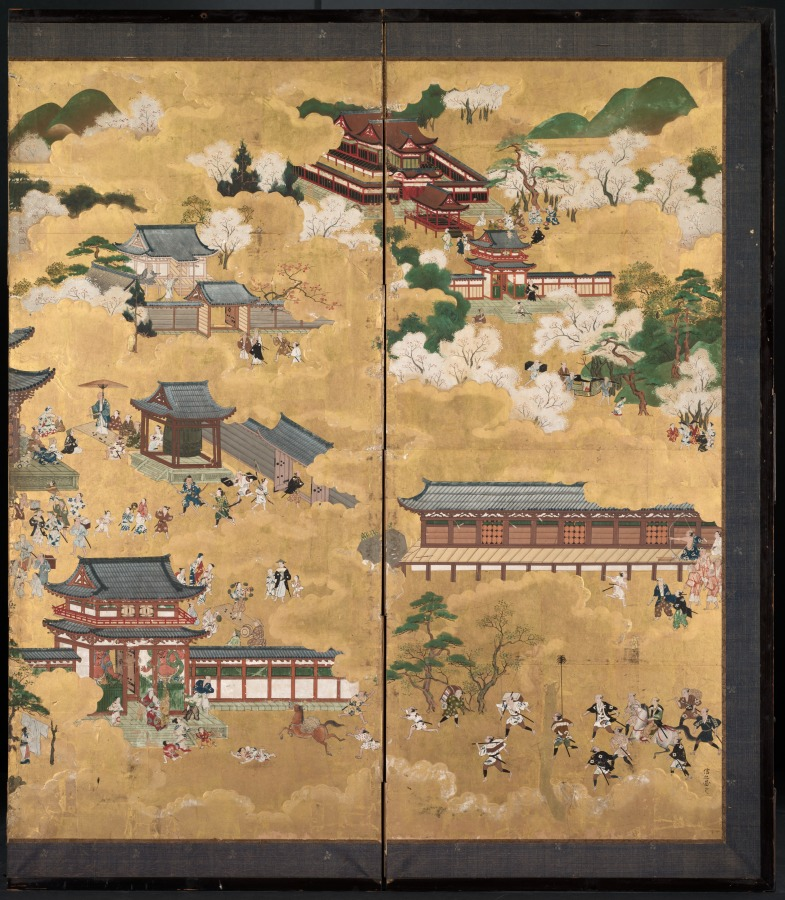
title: Views of Kyoto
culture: Japan, Edo period (1615–1868)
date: 1600s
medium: six-fold screen; ink and color on gold paper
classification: Painting